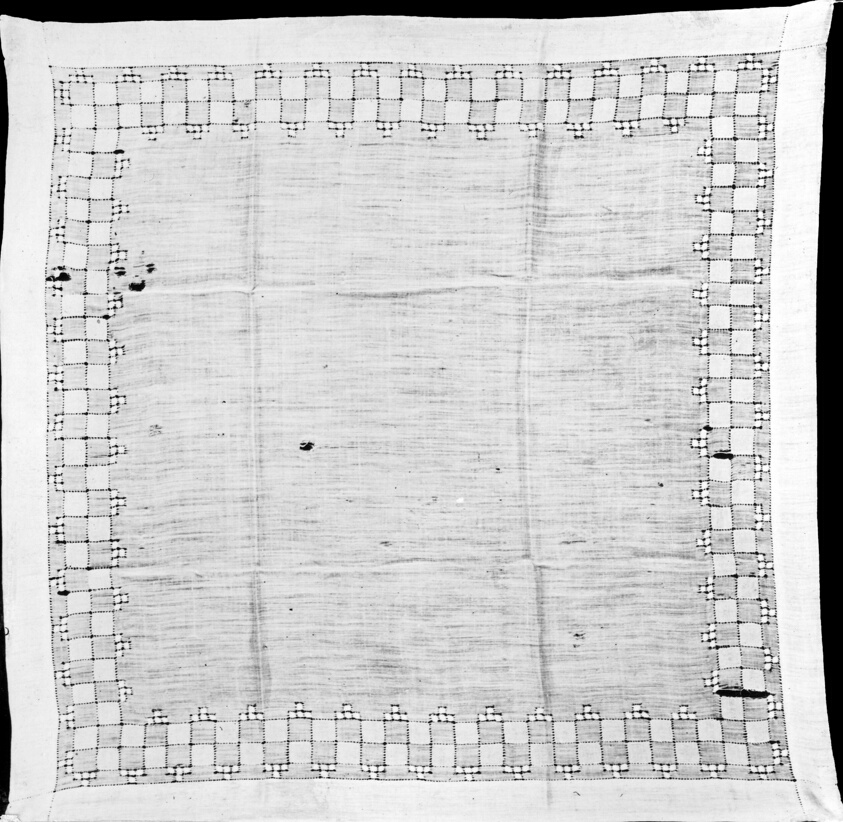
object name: Textile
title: Handkerchief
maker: France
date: 1875/1900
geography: France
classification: textile; needlework (visual works); accessories (object genre); weaving